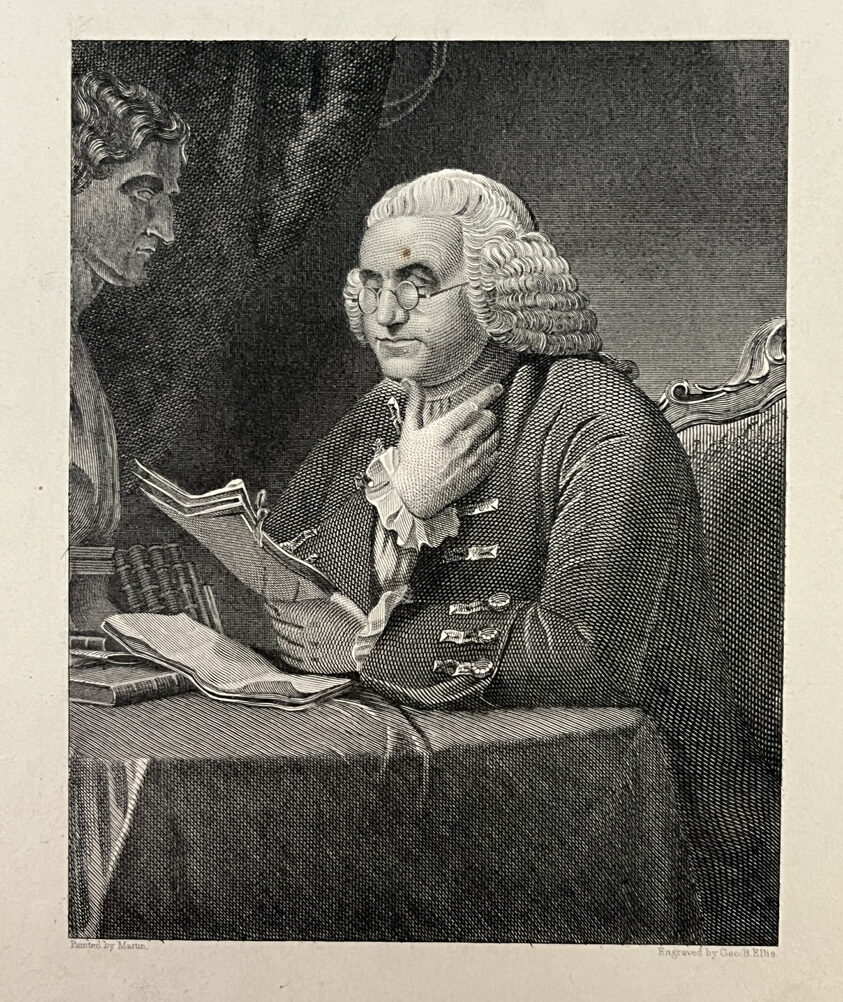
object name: Print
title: Benjamin Franklin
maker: George B. Ellis (American, active 1821-1838); after Martin (likely American, 19th century)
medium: Etching on paper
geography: United States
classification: reproduction; print; prints and drawing